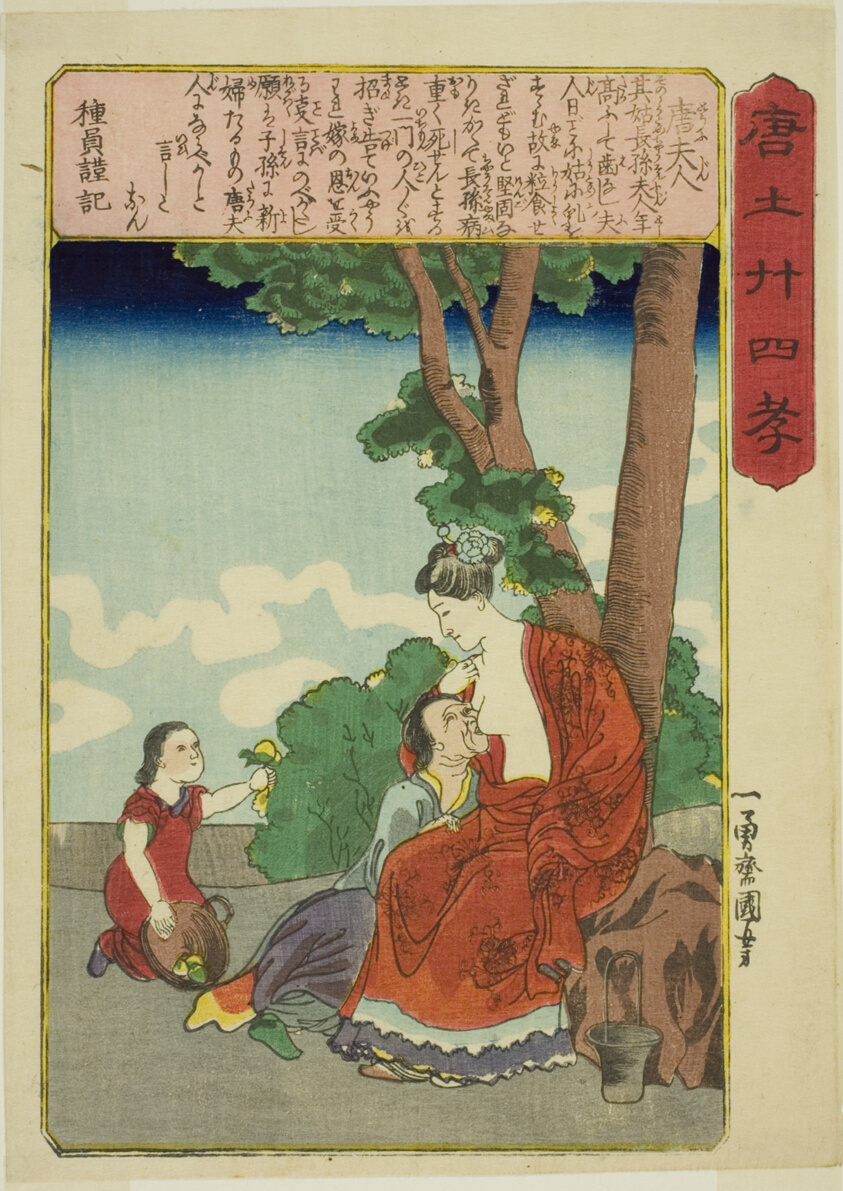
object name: Print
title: Madame Tang (To Fujin), from the series "Twenty-four Paragons of Filial Piety in China (Morokoshi nijushiko)"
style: Japanese (culture or style)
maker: Utagawa Kuniyoshi (Japanese, 1797-1861)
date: c. 1848/50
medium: Color woodblock print; chuban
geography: Japan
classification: woodblock print; print; asian art